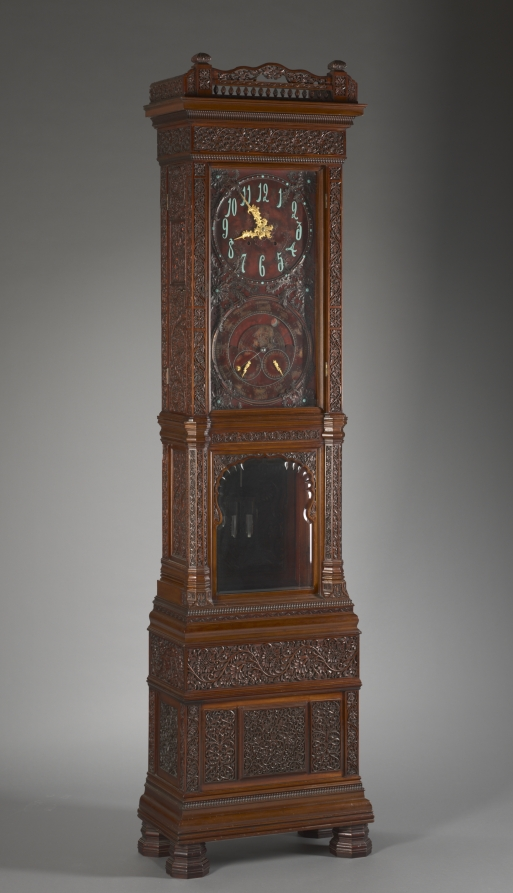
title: Tall Clock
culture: America, New York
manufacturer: Tiffany & Co. (America, New York, est. 1837)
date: c. 1880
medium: mahogany, teak with dial faces of gilded and patinated metal, glass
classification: Furniture and woodwork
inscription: lower dial face inscribed: Tiffany & Co., Makers.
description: In 1879, Louis Comfort Tiffany joined several other artisans to create an interior decoration firm called Associated Artists. The firm was very influential in advocating a rejection of historical styles in favor of the new fashion from more eclectic sources of inspiration, including the Islamic world and Japan. One of Tiffany's partners, Lockwood De Forest, traveled extensively in India to find carved wood and other decorative accessories that could be used in their designs. This clock's design was one result of this collaboration. The heavily carved panels on the clock were likely purchased in India during this time and assembled with a clock mechanism from Tiffany's father's shop, Tiffany and Co., whose name appears on the clock face.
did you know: Associated Artists assembled this clock using imported carved wood panels from India. For an American owner, the motifs suggested decorative styles from faraway places.